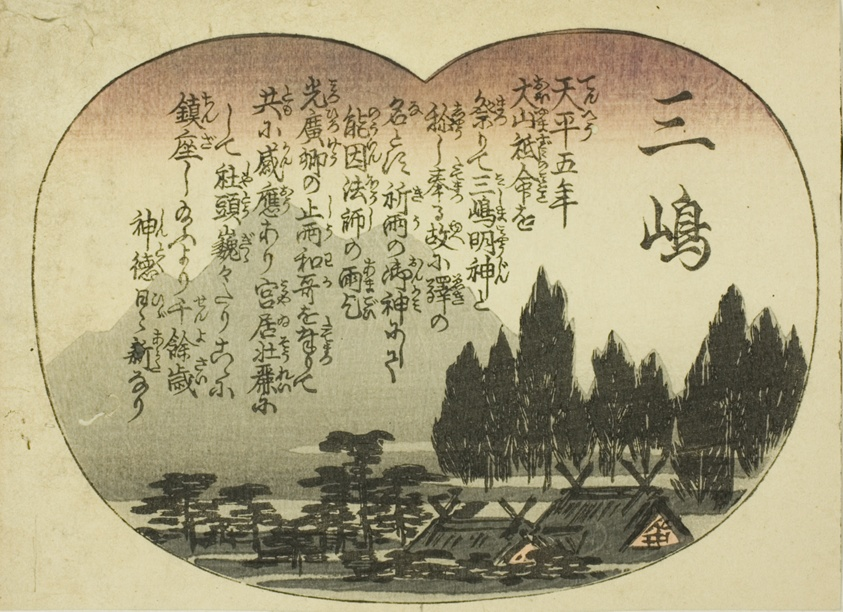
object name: Print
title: Mishima, from the series "Fifty-three Pairings for the Tokaido Road (Tokaido gojusan tsui)"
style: Japanese (culture or style)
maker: Utagawa Hiroshige 歌川 広重; Japanese, 1797-1858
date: c. 1845/46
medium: Color woodblock print; section of oban sheet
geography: Japan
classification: woodblock print; print; asian art